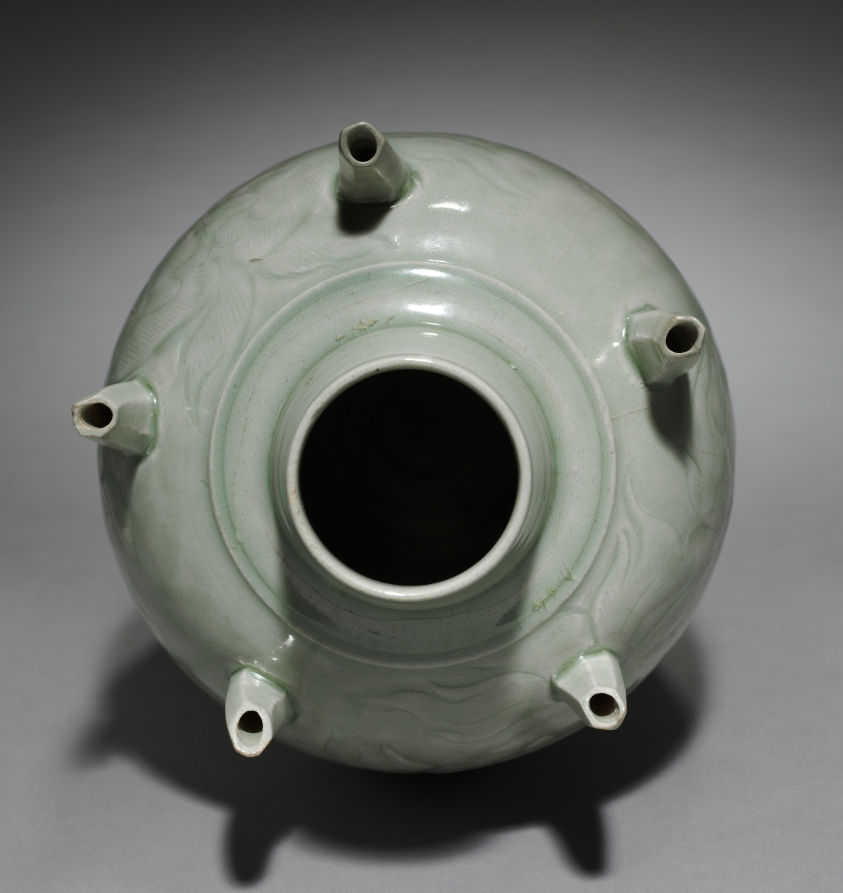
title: Vase with Peonies and Five Spouts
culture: China, Zhejiang province, Hangzhou, Southern Song dynasty (1127-1279)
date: 900s–1000s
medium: green-glazed porcelaneous stoneware with incised decoration, Yue ware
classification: Ceramic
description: "In full autumn wind and dew the kilns of Yue open; And a thousand peaks are despoiled of their halcyon green" (translated by S. W. Bushell). These 9th-century poetic lines glorify the highly prized green-glazed Yue wares of the Tang period. This later example has a pale green glaze that is glassy and consistent, which indicates a precise control of the glaze components as well the kiln atmosphere by reducing the amount of oxygen at some stage during the firing.